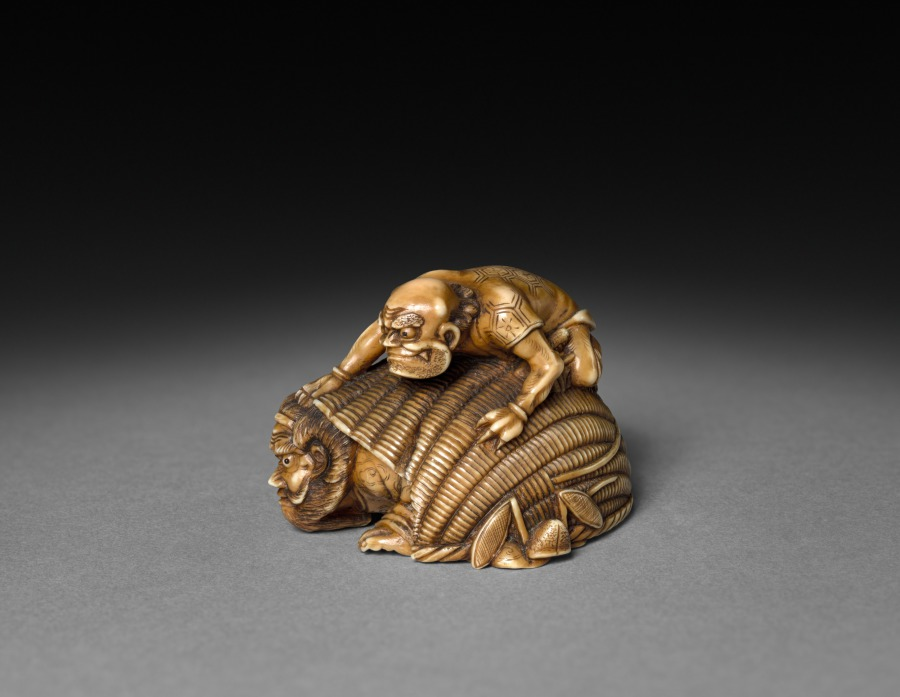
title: Demon Covering Shoki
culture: Japan, Edo period (1615–1868)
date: early to mid-1800s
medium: ivory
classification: Netsuke